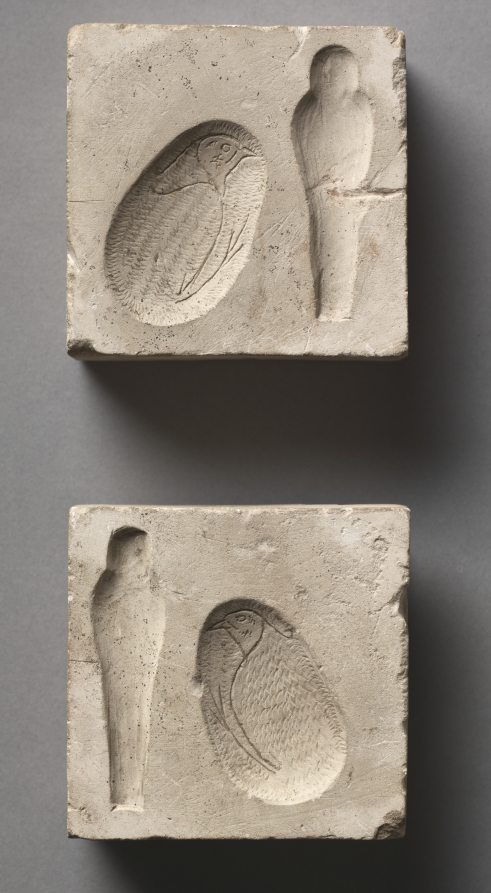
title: Mold in Two Parts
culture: Egypt, Greco-Roman period (332 BCE–395 CE), Ptolemaic dynasty (305–30 BCE) or later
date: 305–30 BCE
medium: limestone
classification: Sculpture